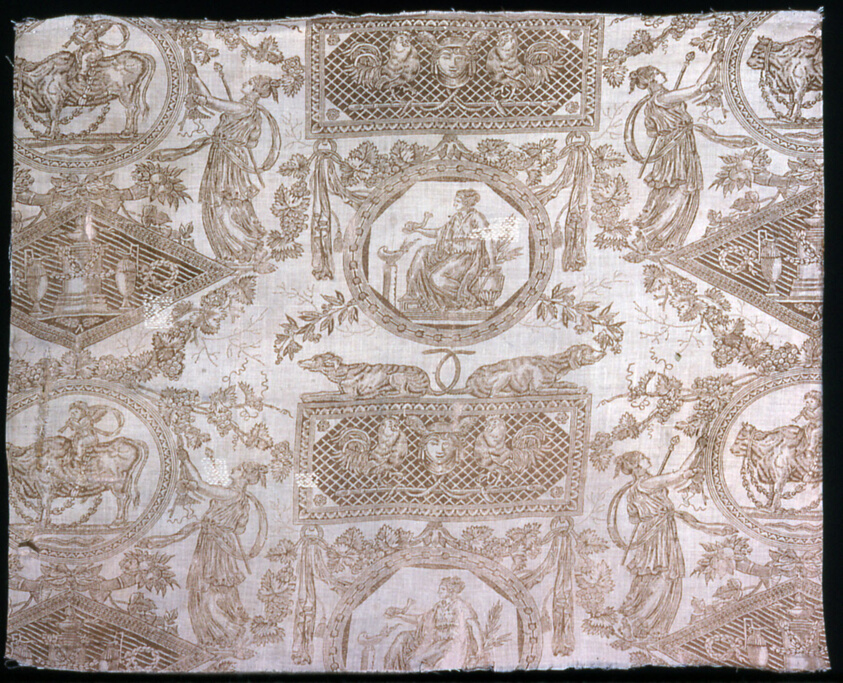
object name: Textile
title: Panel (Furnishing Fabric)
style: Neoclassicism, empire, jouy-en-Josas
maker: Designed by Jean Baptiste Huet (French, 1745–1811); Manufactured by Christophe-Philippe Oberkampf (naturalized French, 1738-1815), Oberkampf Manufactory (French, 1760-1843); Jouy-en-Josas, France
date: 1805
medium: Cotton, plain weave; copperplate printed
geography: Jouy-en-Josas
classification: weaving - printed; textile; furnishing textile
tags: goddesses, animals, arabesque, dogs, foliage, medallions, oxen, roosters, urns